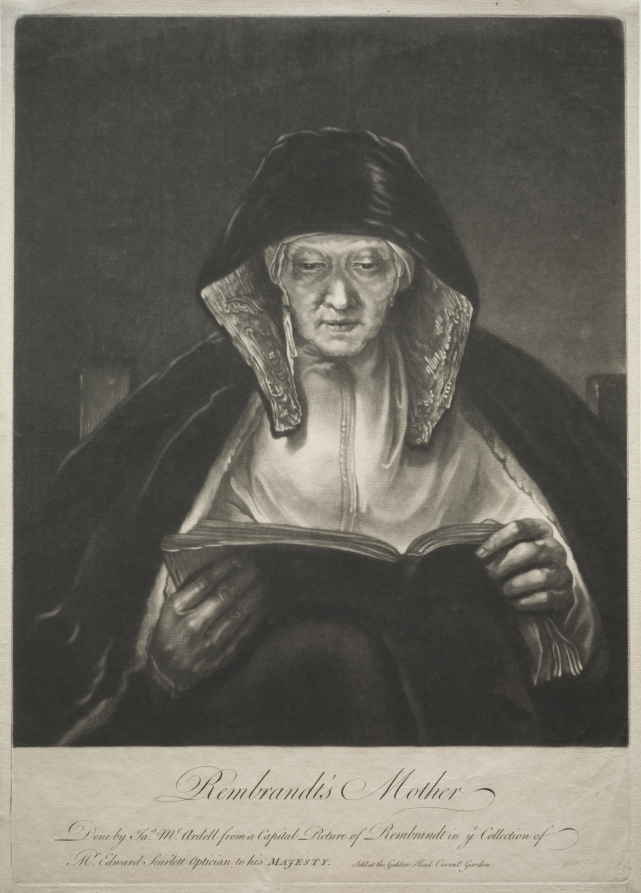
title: Rembrandt's Mother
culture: England, 18th century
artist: James McArdell (British, 1728/29–1765)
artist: after Rembrandt van Rijn (Dutch, 1606–1669)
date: c. 1740–65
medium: mezzotint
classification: Print